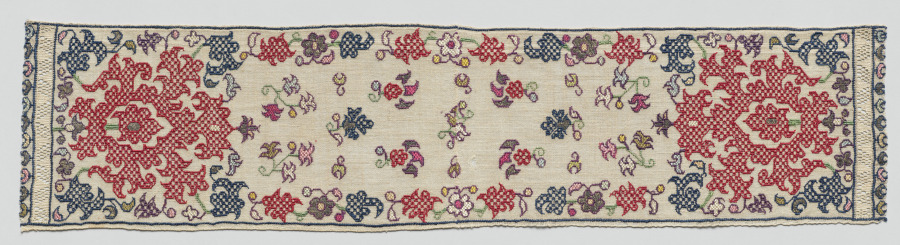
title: Part of a Cap (beniqa)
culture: Africa, North Africa, Algeria, Algerian embroiderer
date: 1700s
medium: Linen, silk, metal, dye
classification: Embroidery